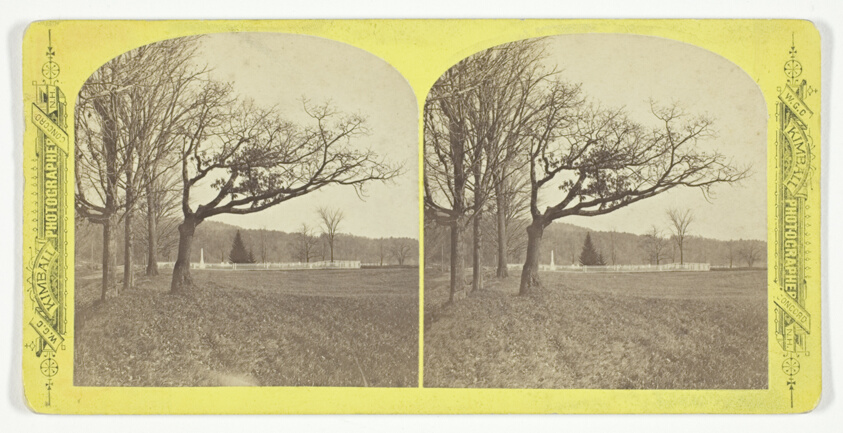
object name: Photograph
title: Orphans' Home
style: 19th century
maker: W.G.C. Kimball (American, 1868-1916)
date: Late 19th century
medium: Albumen print, stereo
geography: New Hampshire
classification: photography; photograph; albumen silver print; stereograph (albumen)